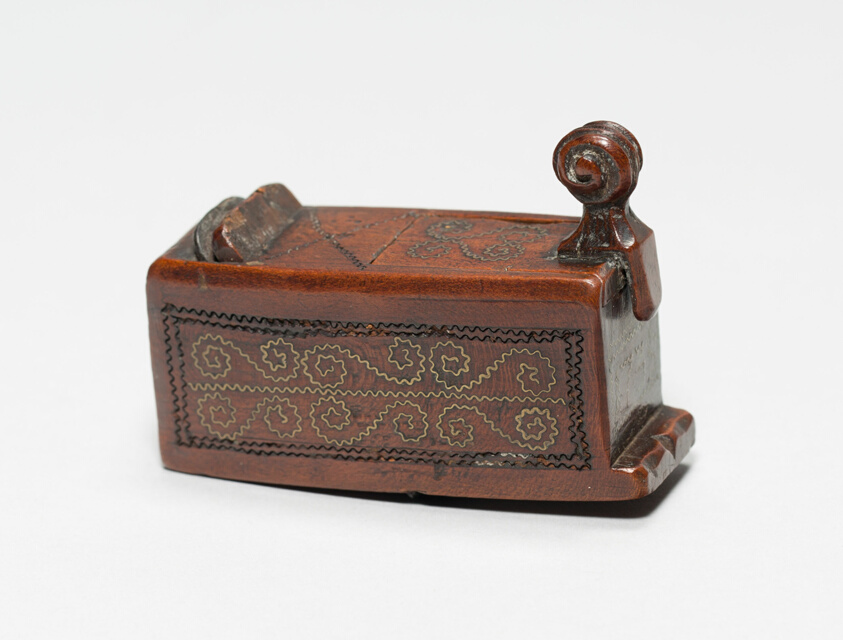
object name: Metalwork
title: Smoothing Plane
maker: Possibly Germany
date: 1735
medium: Hardwood, horn, and brass wire inlay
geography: Germany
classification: tool; european decorative arts; metalwork